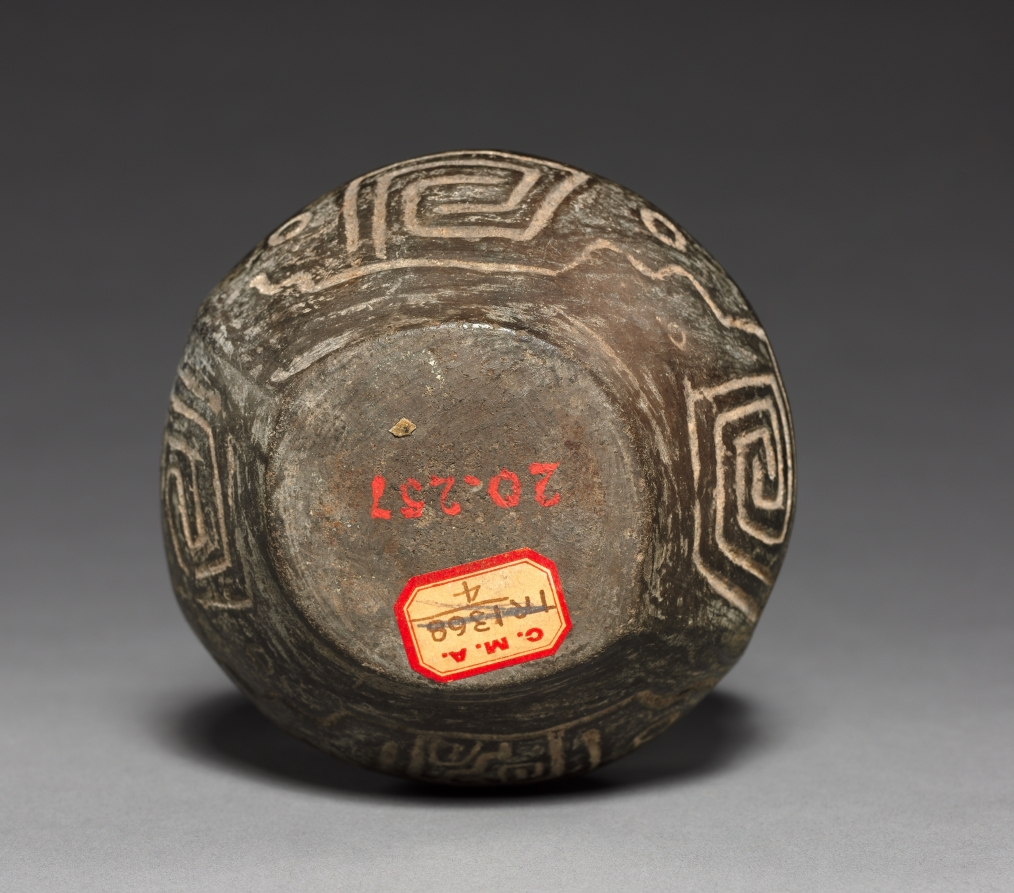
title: Bottle Vase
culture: Peru, Chimú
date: 1200–1400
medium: black ware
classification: Ceramic